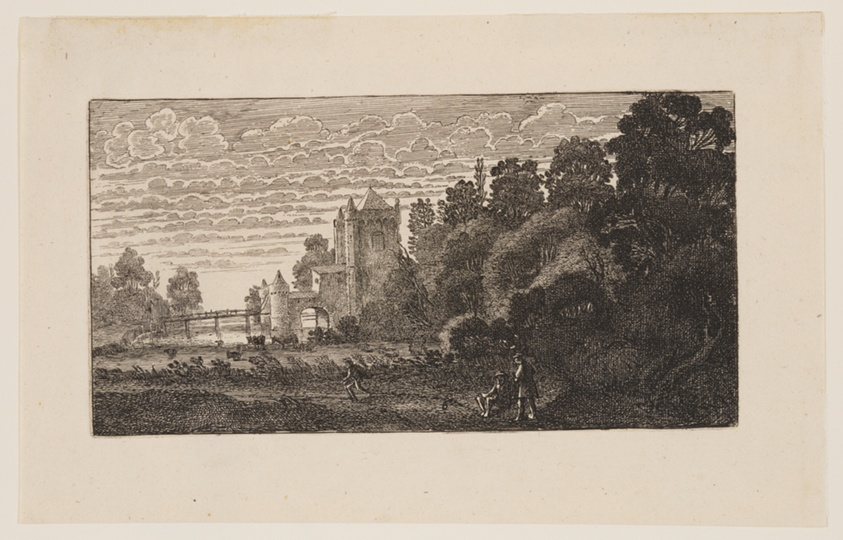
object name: Print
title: The ‘Spaernwouder’ or ‘Amsterdamsche Poort’ at Haarlem, from Six Landscapes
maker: Jan van de Velde II; Dutch, c. 1593–1641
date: c. 1613-1640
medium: Etching on ivory laid paper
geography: Netherlands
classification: etching; paper; print; prints and drawing